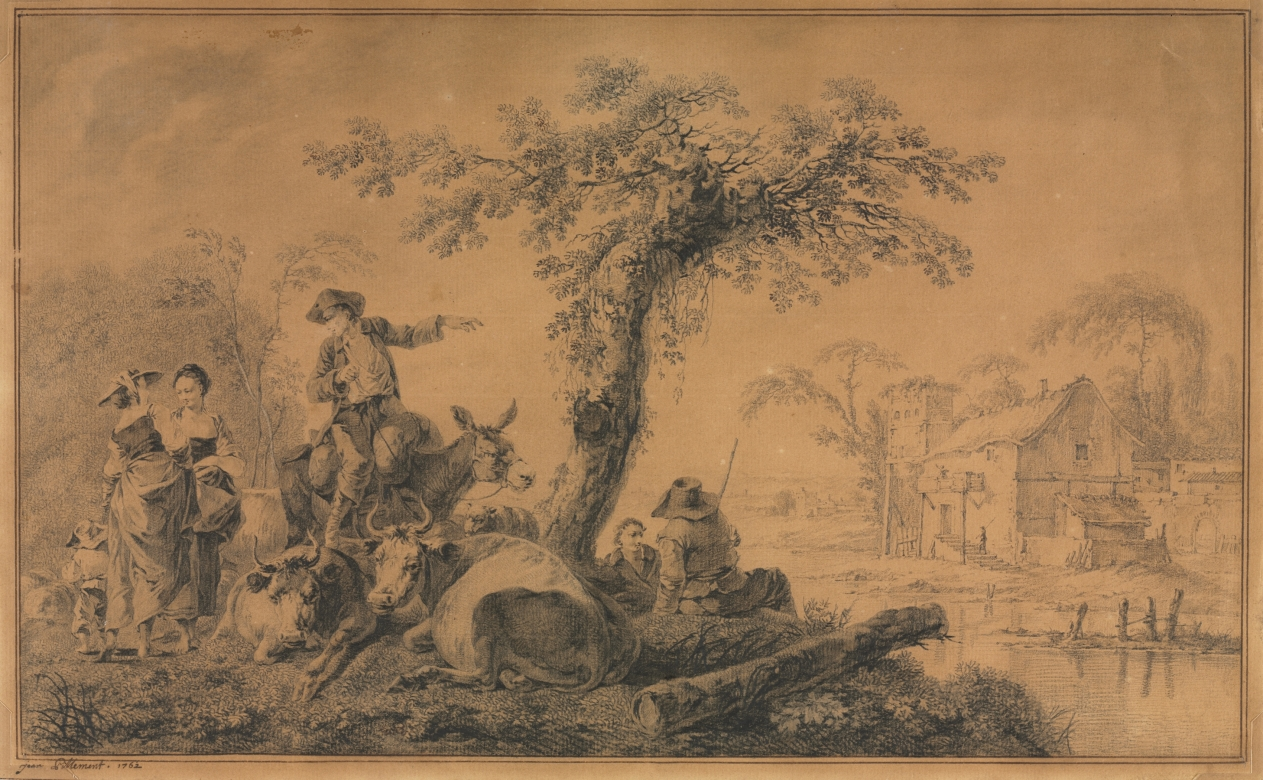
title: Rural Scene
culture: France, 18th century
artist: Jean Baptiste Pillement (French, 1728–1808)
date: 1762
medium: black chalk or black crayon; framing lines in brown ink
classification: Drawing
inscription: Inscribed, lower left in iron gall ink: Jean Pillement 1762